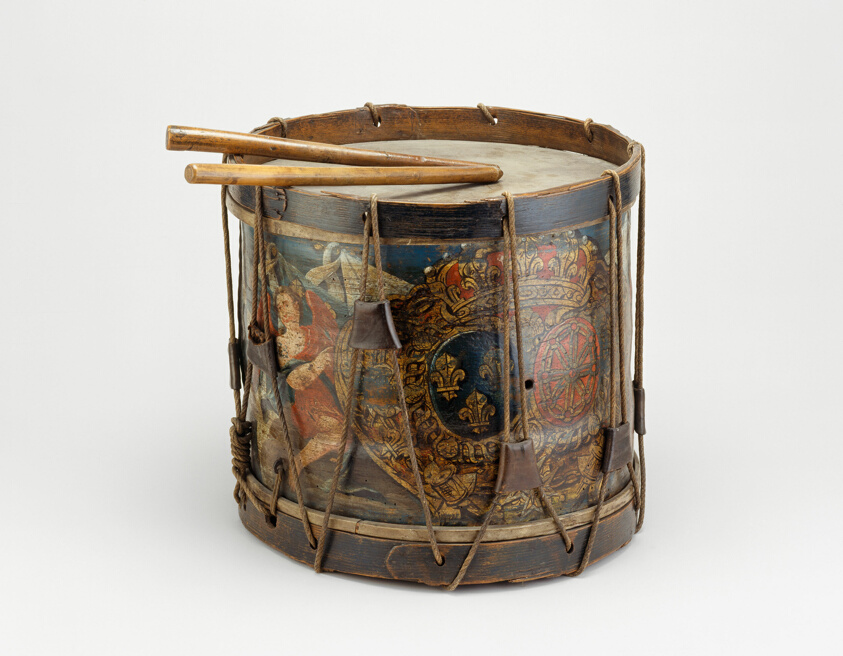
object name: Armor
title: French Military Side Drum and Drumsticks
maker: French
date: 1772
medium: Wood, brass, iron, hide, cord, and paint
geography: France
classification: arms and armor, miscellaneous; arms and armor; armor